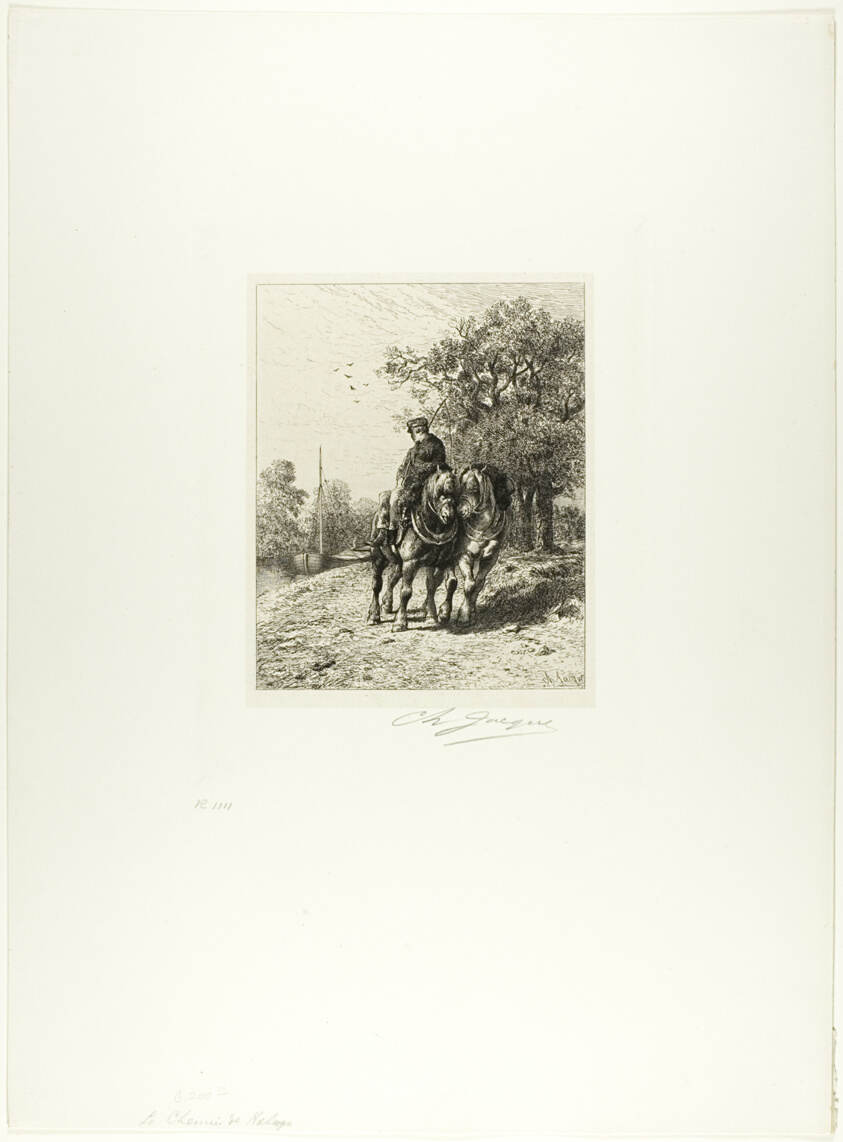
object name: Print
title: The Towpath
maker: Charles Émile Jacque (French, 1813-1894)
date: c. 1864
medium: Etching on light gray China paper laid down on ivory wove paper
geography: France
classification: etching; print; prints and drawing